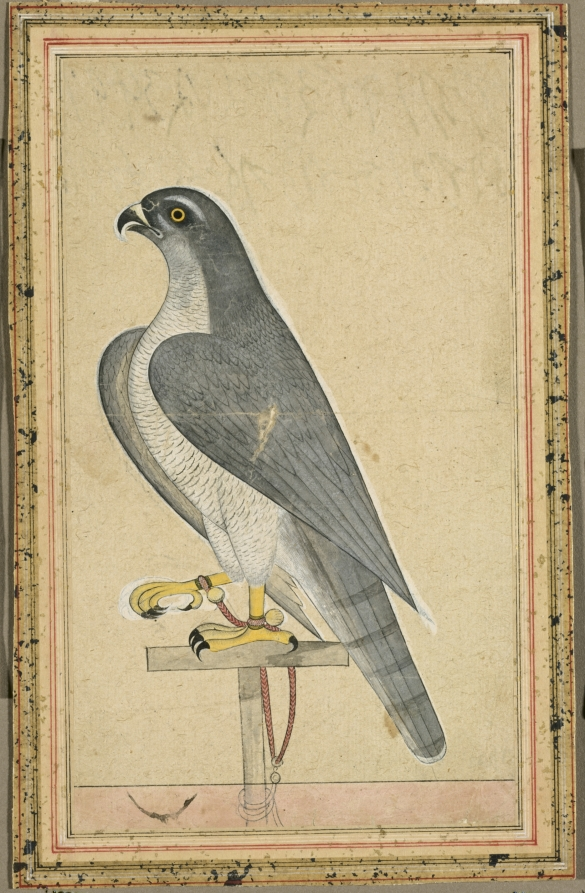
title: Falcon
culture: Northern India, Pahari kingdoms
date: c. 1770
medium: Gum tempera and gold on paper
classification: Painting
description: The imperial Mughal practice of keeping portraits of animals was adopted by art patrons and collectors in small states and kingdoms under the umbrella of the Mughals. Falconry, the sport of hunting small game with a bird of prey, was a popular activity among the highest ranks of Mughal royalty. The falcon depicted in this painting appears to be a peregrine. Cords with bells keep the trained hunting bird tethered to its roost.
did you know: Indian artists used white-out, white paint, to cover mistakes and make changes.